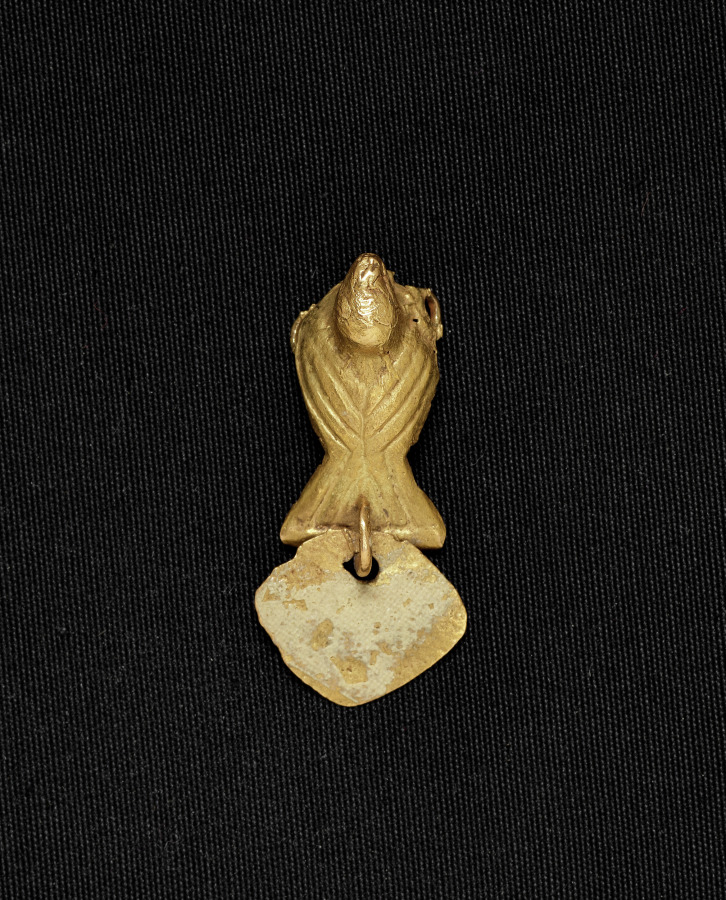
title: Bird Bead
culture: Colombia, Muisca style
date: c. 900–1550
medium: cast gold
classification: Jewelry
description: Muisca metalwork divides into two categories: ornaments to be worn, such as these, and offering figurines, in the case to the right. The elaborate bird pendant features delicate herringbone moldings, openwork patterns, and wing details-all part of the wax model from which the pendant was cast (see nearby computer animation). The dangles were attached after casting.